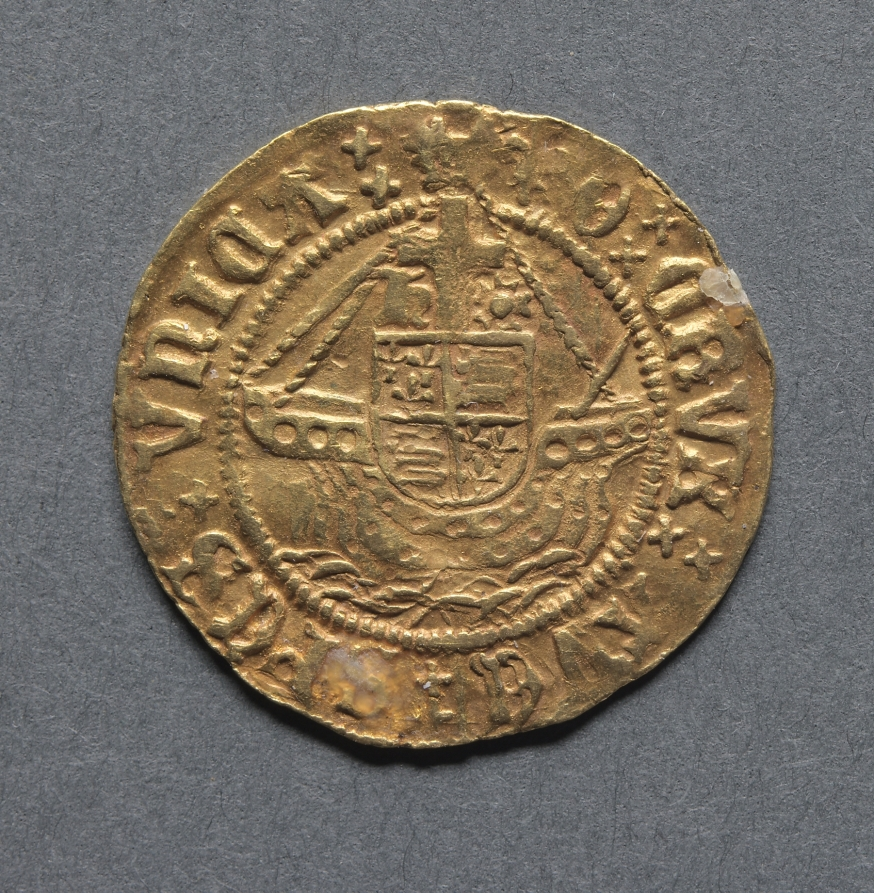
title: Half Angel: Ship with Shield of Arms (reverse)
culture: England, Henry VIII, 1509-1547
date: 1526–1544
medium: gold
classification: Coins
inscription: O CRVX AVE SPES VNICA